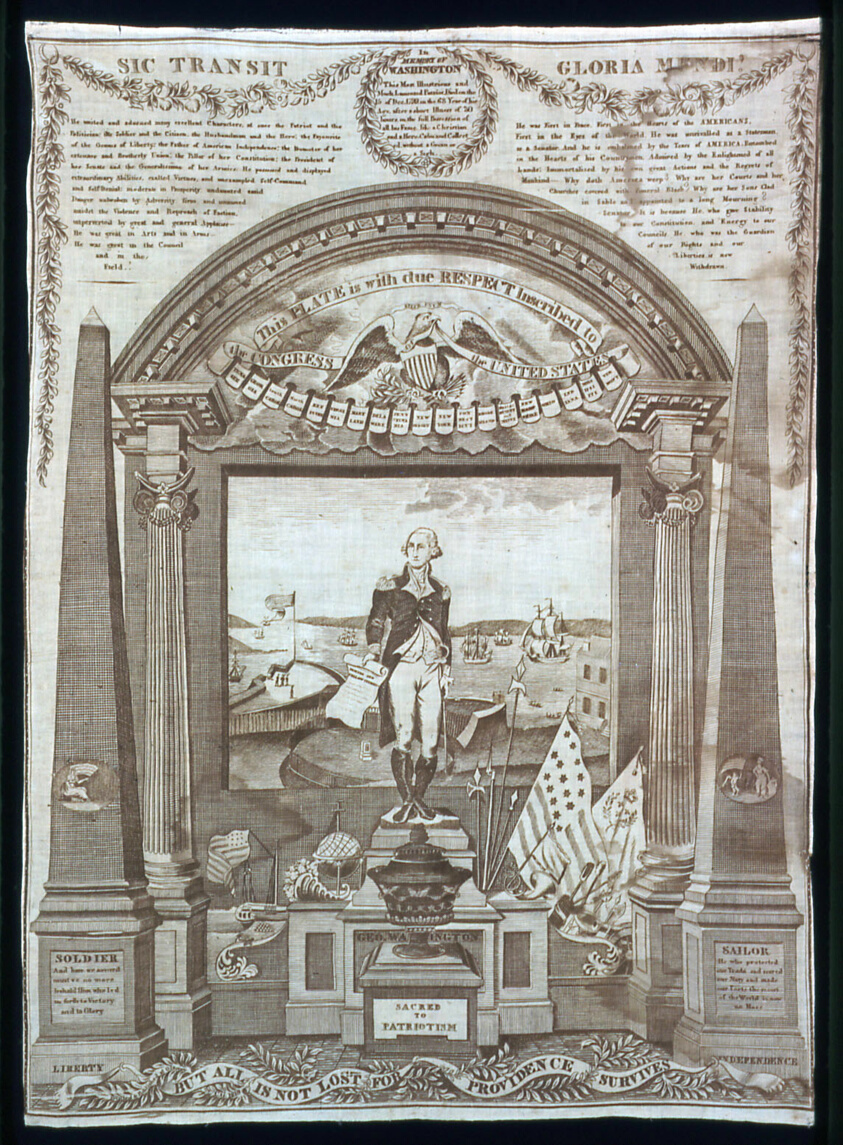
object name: Textile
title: George Washington at the Altar of Liberty (Handkerchief)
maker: Possibly printed by Charles Gray (Scottish, active c. 1819) or Colin Gillespie (Scottish, active c. 1819); Engraved by Cornelius Tiebout (American, 1777–1832) after a drawing by Charles Buxton (American, 1768–1833) and Gilbert Stuart (American, 1755–1828); Scotland, Glasgow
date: 1819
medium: Cotton, plain weave; copperplate printed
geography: Glasgow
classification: textile; weaving - printed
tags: propaganda